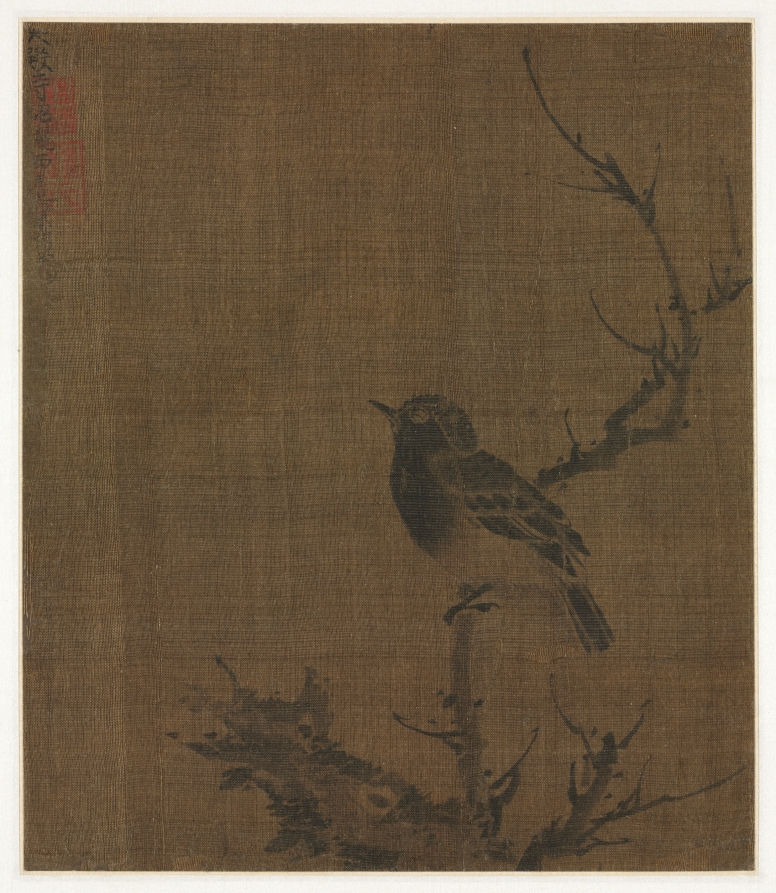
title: Sleeping Bird on a Prunus Branch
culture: China, Ming dynasty (1368–1644)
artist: Bian Wenjin (Chinese, about 1354–1428)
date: 1400s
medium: album leaf; ink on silk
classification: Painting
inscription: Artist's inscription, signature, and 2 seals: Painted by Pien Ching-chao of Lung-hsi, painter-in-attendance of [Wu]-ying-tien. [seals] I-ch'ing-tung-chih; Pien shih Wen-chin